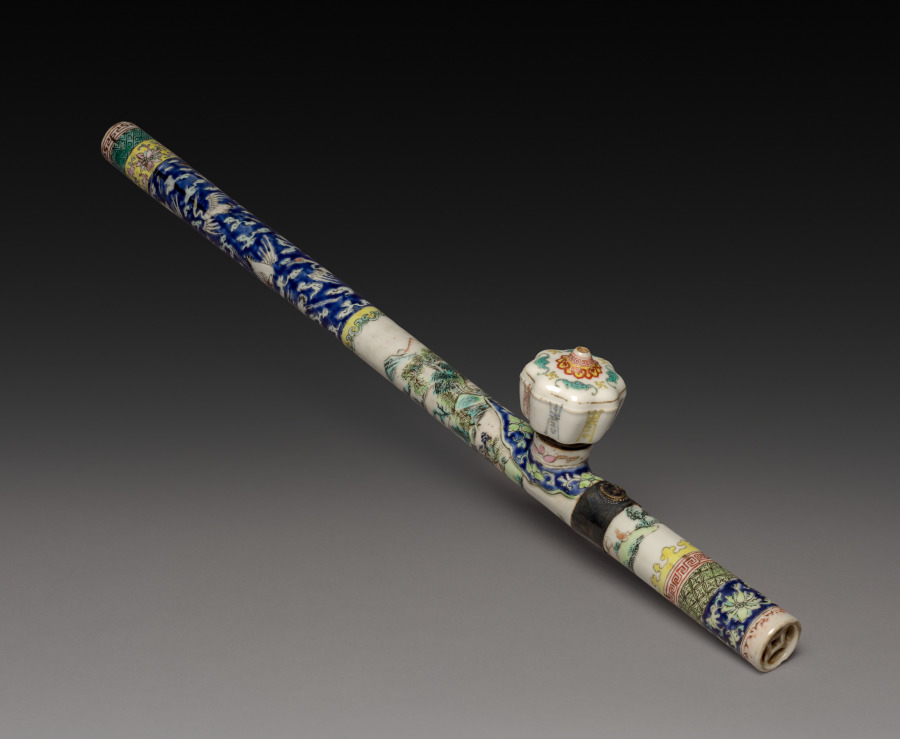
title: Pipe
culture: China, Qing dynasty (1644-1911)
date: 1644–1911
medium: famille verte porcelain with blue overglaze enamel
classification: Miscellaneous